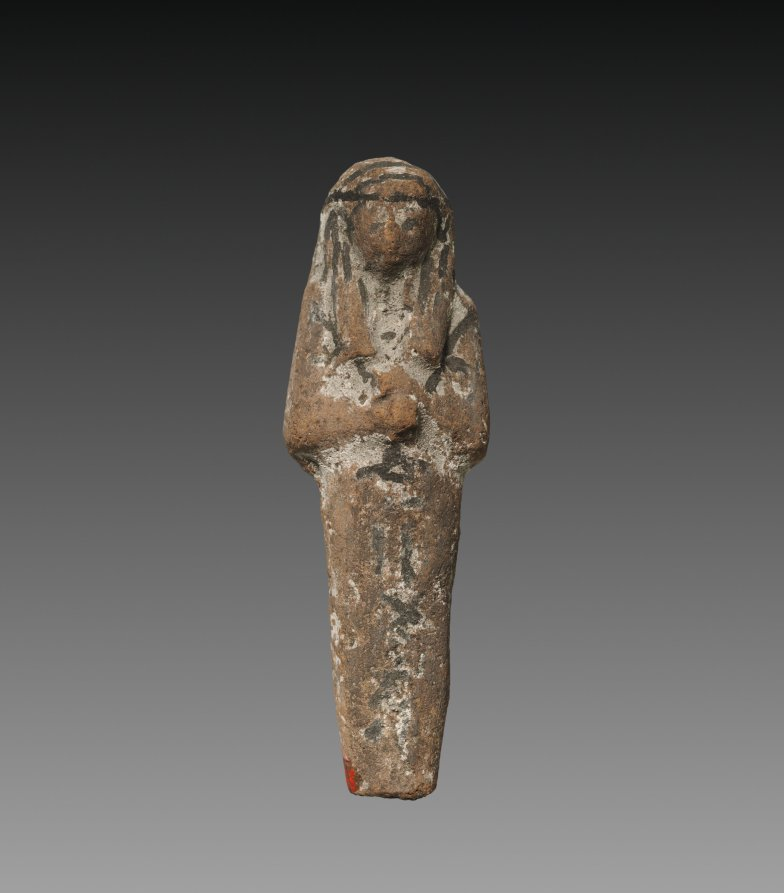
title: Shawabty of Padiamen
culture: Egypt, Third Intermediate (1069–715 BCE), Dynasty 21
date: 1025–975 BCE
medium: painted terracotta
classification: Funerary Equipment